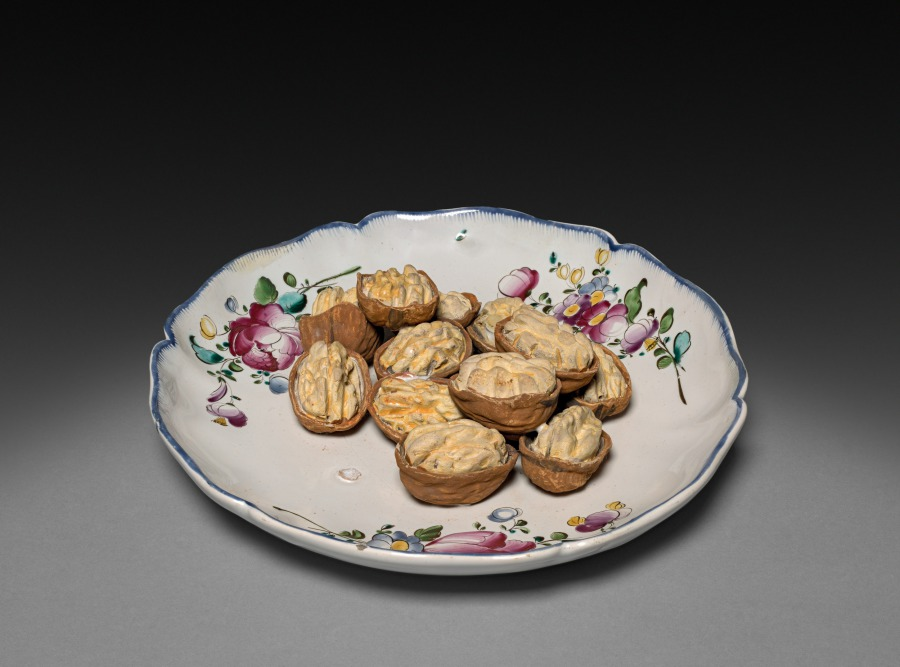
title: Plate of Walnuts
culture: France, Sceaux, 18th century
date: c. 1770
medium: faience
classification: Ceramic